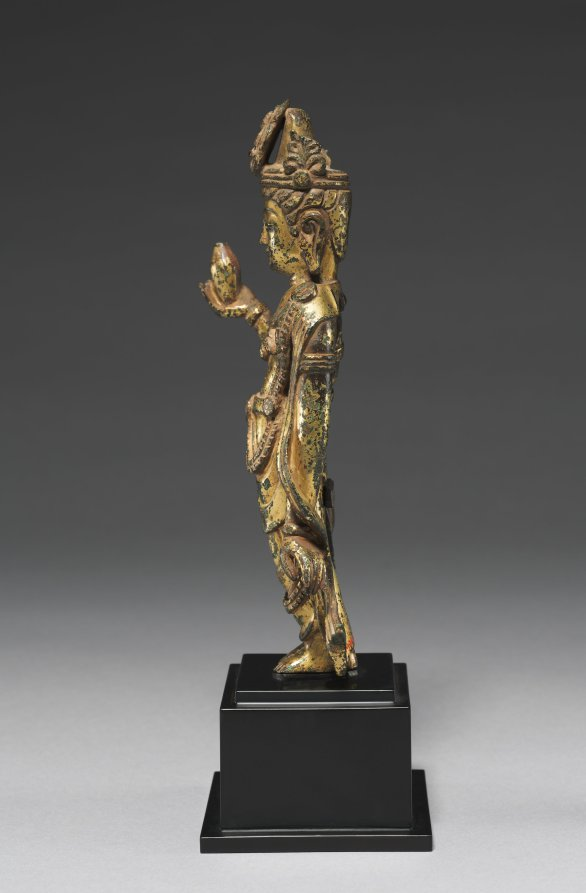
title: Standing Avalokitesvara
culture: Korea, Unified Silla period (668-935)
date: 700s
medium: Gilt-bronze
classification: Sculpture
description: This small gilt-bronze statue represents the Bodhisattva of Compassion (관음보살 in Korean), an enlightened being who helps devotees on their path. It features two prominent attributes: a water sprinkler (kundika in Sanskrit) and a miniature image of Buddha Amitābha in its jeweled crown. Its sweet and gentle smile accentuates this celestial being’s immeasurable compassion for human suffering.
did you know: Created during the Unified Silla period, a high point of the spread of Buddhist teachings, this kind of miniature gilt-bronze statue was often used as a portable object of devotion by traveling Buddhist monks.